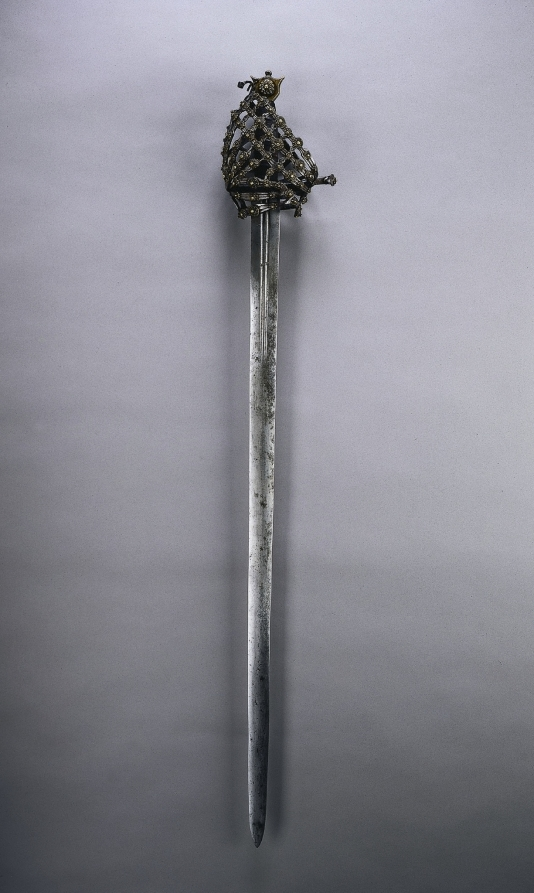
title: Schiavona Broadsword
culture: Italy, Venice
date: 1700s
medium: steel, brass, leather and wood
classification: Arms and Armor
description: This broadsword or basket-hilted sword is a type that was often carried by the bodyguards of the Doge of Venice who came from the Dalmatian Coast of present-day Croatia and were then called Schavoni in Venice. The complex barred guard slopes forward and protects the hand.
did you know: This sword has what is known as a "cat's head" pommel, a spherical knob that serves as a counterweight at the opposite end of the sword from the point.